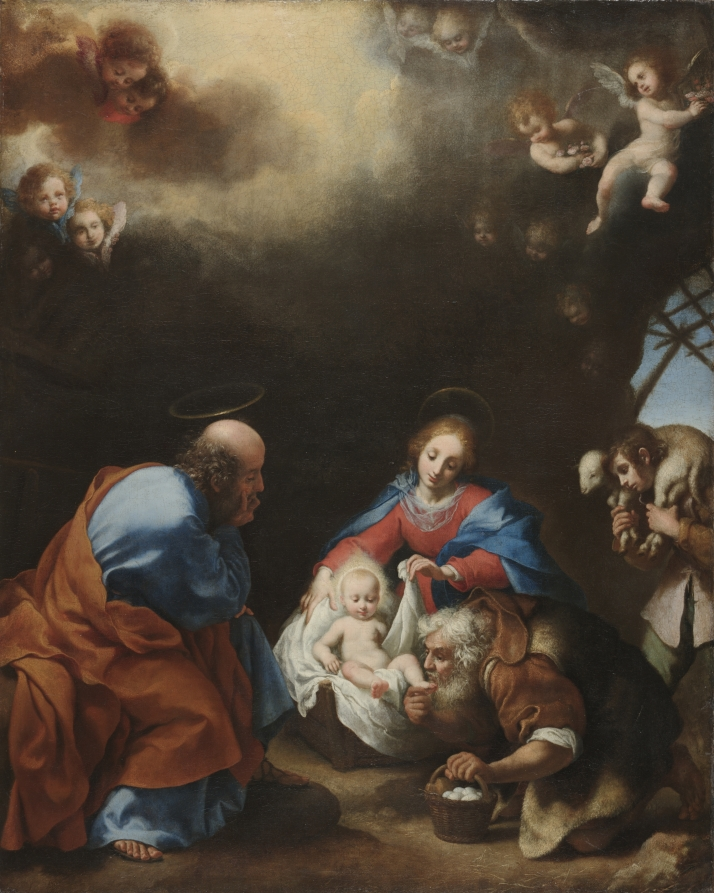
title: Adoration of the Shepherds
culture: Italy, 17th century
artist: Carlo Dolci (Italian, 1616–1687)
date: c. 1670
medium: oil on canvas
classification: Painting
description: The historical significance of the Baroque painter Carlo Dolci, a precocious artist whose skill was recognized early by the leading Florentine patrons of his time, is often diminished due to his traditionalist compositions. Having gained local reputation as a talented portraitist and painter of religious narrative, Dolci's anti-Mannerist technique dismissed many of the leading Baroque trends as superfluous, retaining an unobtrusive and placid style in the manner of those before him. Having been a devout follower of the brotherhood of St. Benedict, Dolci draws upon a strict Christian iconography in his depiction of the shepherds' witness account of the birth of Christ. --Charles Eppley (January 2009)